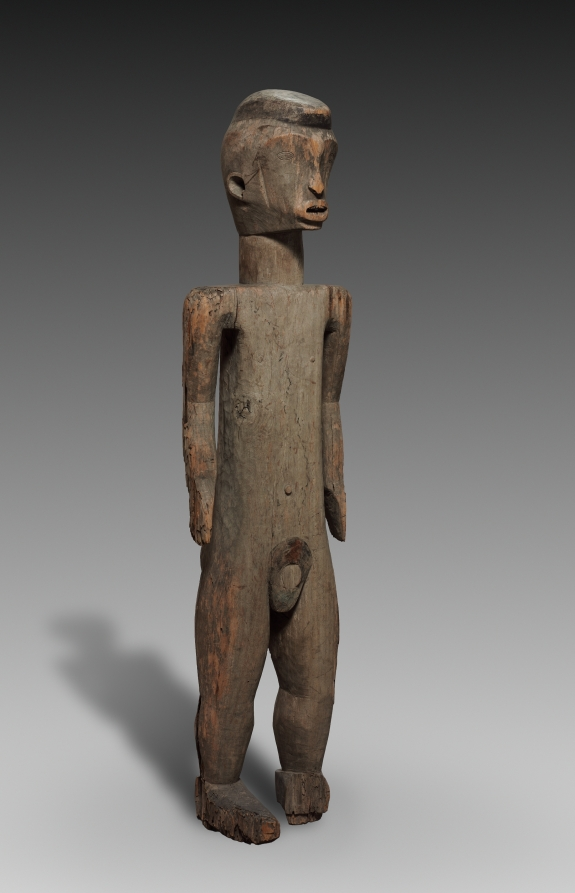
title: Figure of a Pair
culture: Africa, Central Africa, Democratic Republic of the Congo or Central African Republic (most likely), possibly Monzombo-style maker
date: late 1800s–early 1900s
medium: Wood and iron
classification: Sculpture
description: The Ubangi region's history of successive migrations and assimilations has resulted in numerous exchanges of religious beliefs and ritual practices. Despite some stylistic traits, including the heart-shaped faces and the male's crested coiffure, this figure with its female pair is unlike any other in the Ubangian corpus. Based on indirect evidence, the pair is said to represent the culture's primordial couple.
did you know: This pair is of a male and female and is said to represent the culture's primordial couple. There are no other carved mother-child figures that originate from the Monzombo ethnic group.